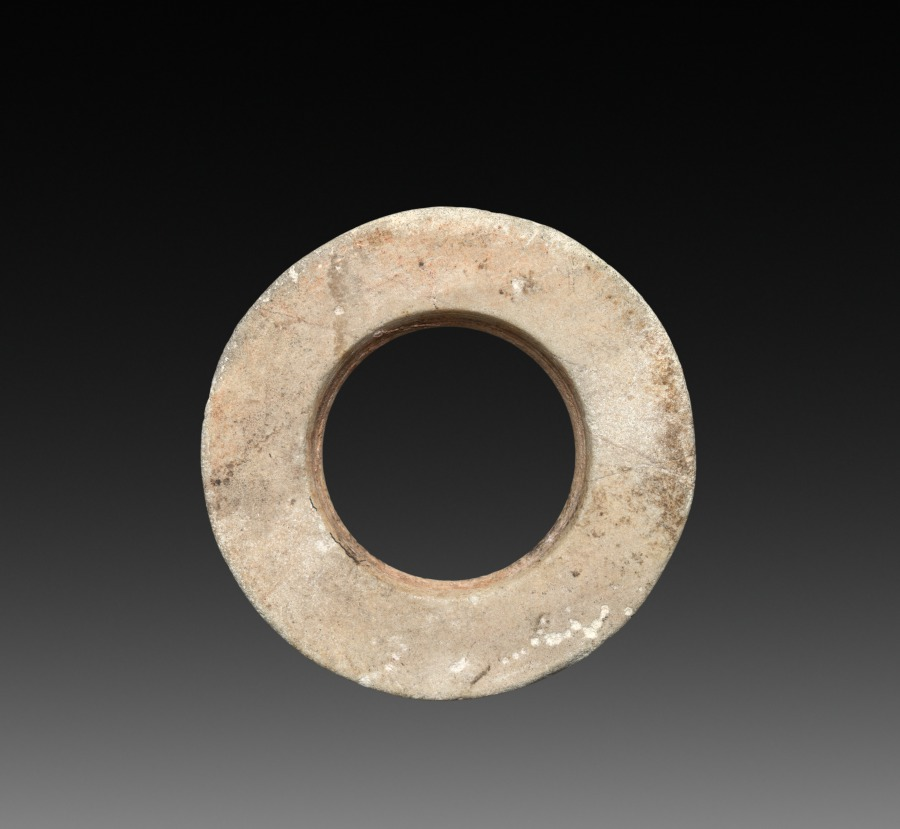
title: Ring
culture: China, Han dynasty (202 BCE–220 CE) or later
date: 200 CE or later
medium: stone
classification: Jewelry